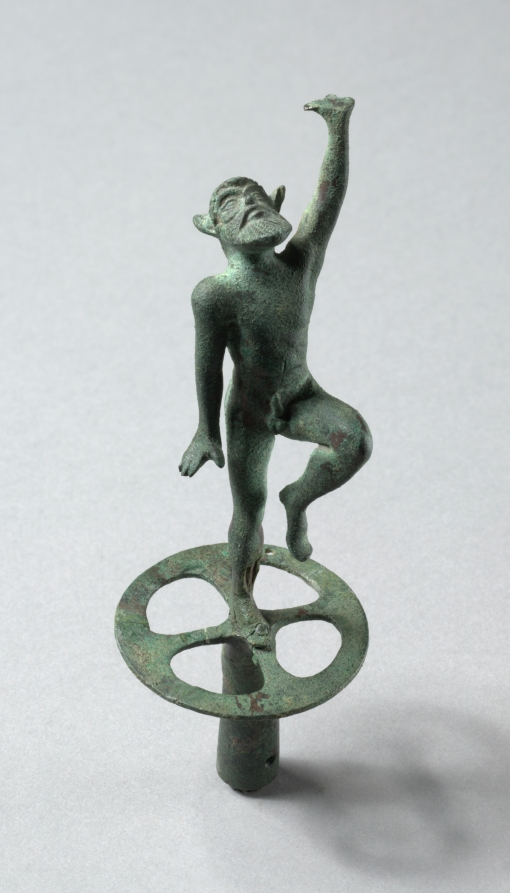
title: Kottabos Element of a Dancing Satyr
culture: Etruscan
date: 470–450 BCE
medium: bronze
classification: Sculpture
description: This diminutive dancing satyr, identifiable by his snub nose and equine ears (though without a tail), lifts his leg and reaches with an upstretched arm toward a dish, now lost. The disc and cylinder on which he stands likely rested atop a much taller post, with a larger disc or dish below, as preserved in more complete examples and illustrated on numerous ancient vases. In the drinking game kottabos, known by its Greek name but also popular in Etruria, the goal was to knock a dish off its precarious perch, in this case the hand of the dancing satyr, using only the wine dregs in your cup.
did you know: This lively object was likely used to play a drinking game called kottabos.